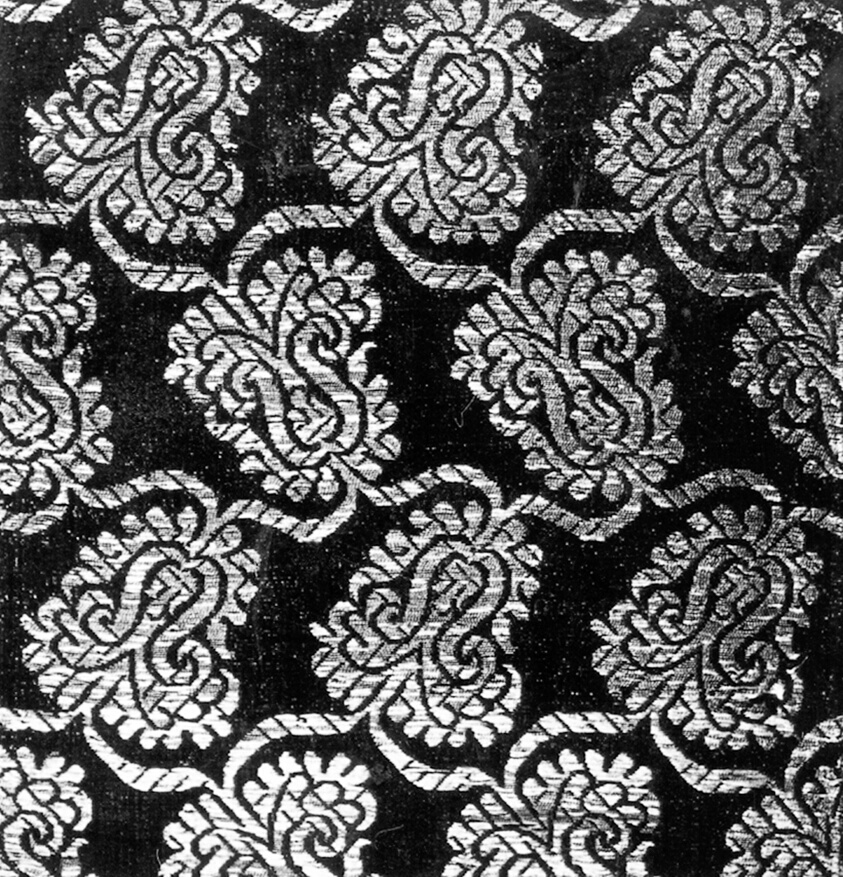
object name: Textile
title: Fragment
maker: Spain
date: Early/mid–17th century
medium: Brocaded silk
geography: Spain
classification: textile; weaving